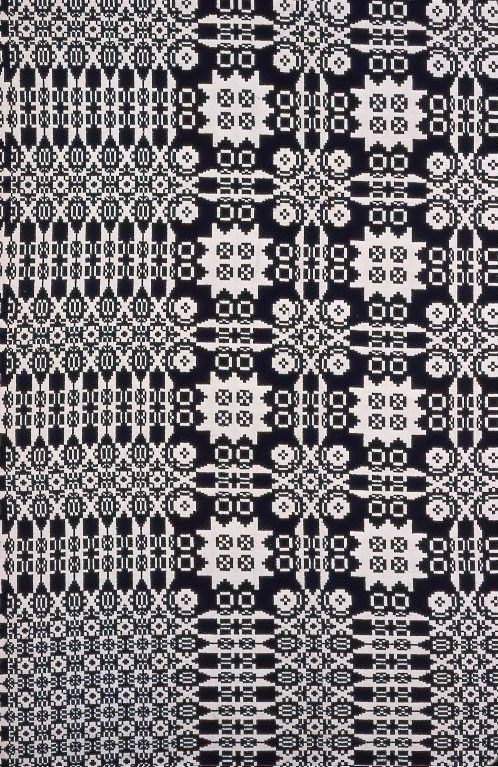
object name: Textile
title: Coverlet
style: 19th century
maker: United States, New York, Ontario County, Gorham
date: 1833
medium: Cotton and wool, plain weave double cloth; two loom widths joined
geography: New York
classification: weaving - coverlet; coverlet; weaving; textile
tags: geometric, geometric motif, coverlet